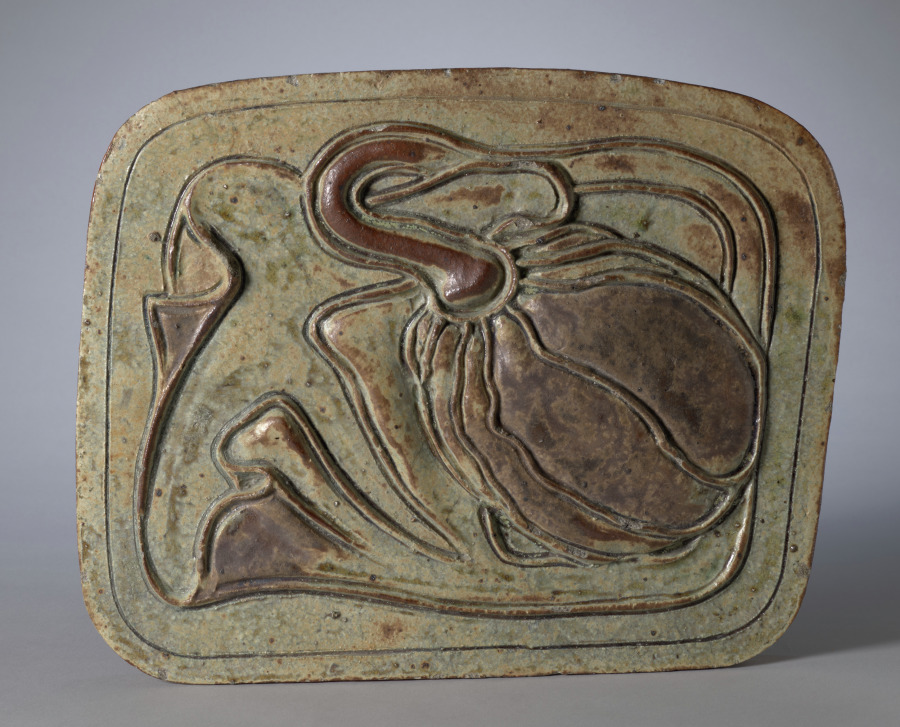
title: Tile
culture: France, early 20th Century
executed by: Alexandre Bigot (French, 1862–1927)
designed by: Henri Sauvage (French, 1873–1932)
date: c. 1900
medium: earthenware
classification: Ceramic